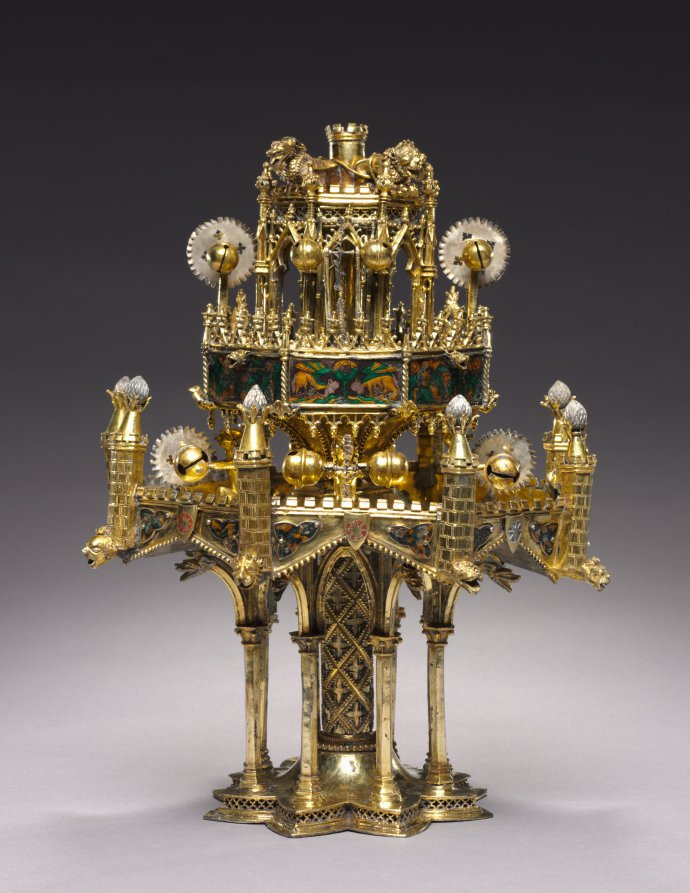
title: Table Fountain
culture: France, Paris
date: c. 1320–40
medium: gilt-silver and translucent enamels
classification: Metalwork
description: Conceptually and stylistically, this object is beyond all else a piece of Gothic architecture in miniature with vaults, pinnacles, columns, and traceried arches. Though the artist who created it is unknown, he was unquestionably inspired by the great Gothic buildings of his time. The table fountain is a three-tiered assembly combining cast elements with bent sheets of gilt-silver. To these have been attached a series of enamel plaques representing grotesque figures, some of which play musical instruments. Water wheels and bells were added to capture motion and sound. The rich detail, precious materials, and involved ornamentation of this deluxe object suggest it would have been expensive to produce and highly treasured by its original owner, someone of high status, and would have been deployed as an object of spectacle. This is the most complete example of its type known to survive from the Middle Ages. Medieval inventories reveal that small fountains like this, often taking various forms, and generally made from precious metals, once existed in large numbers, thus making the Cleveland table fountain an extremely rare object.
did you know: This fountain with its minute architectural details and finely made enamel plaques displayed the wealth and refinement of the owner as it entertained his guests. Imagine hearing the ringing of the tiny bells when this fountain was in use.